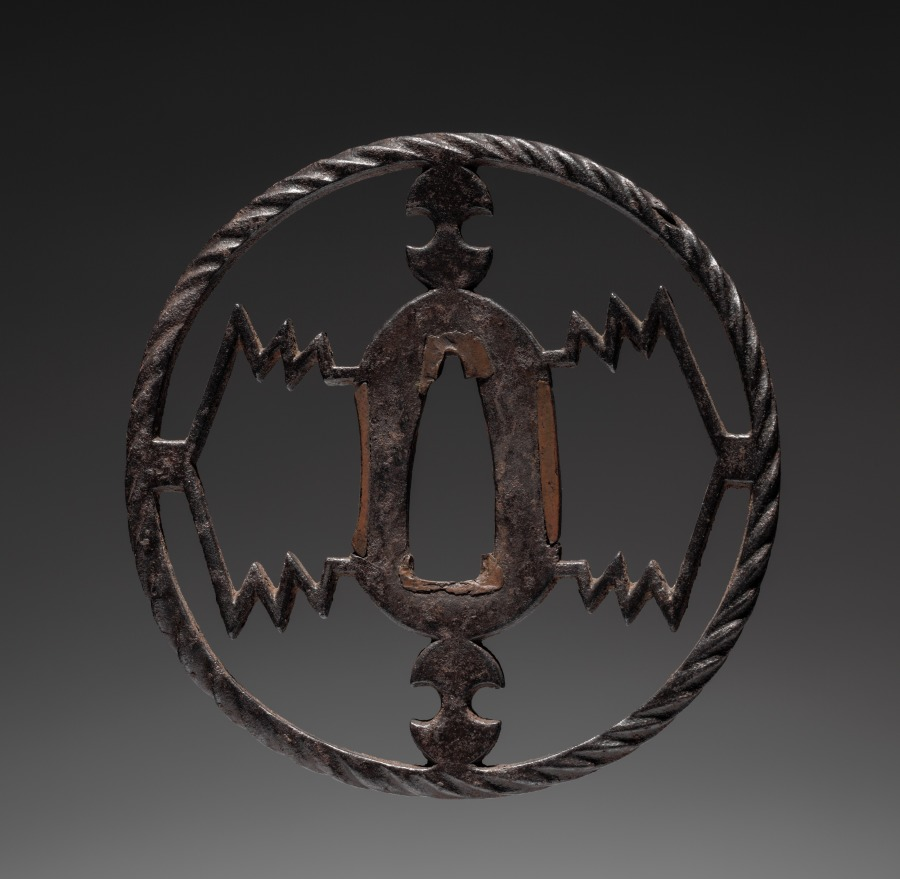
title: Sword Guard (Tsuba)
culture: Japan, possibly Edo period (1615-1868)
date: c. 1615–1868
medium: iron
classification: Arms and Armor